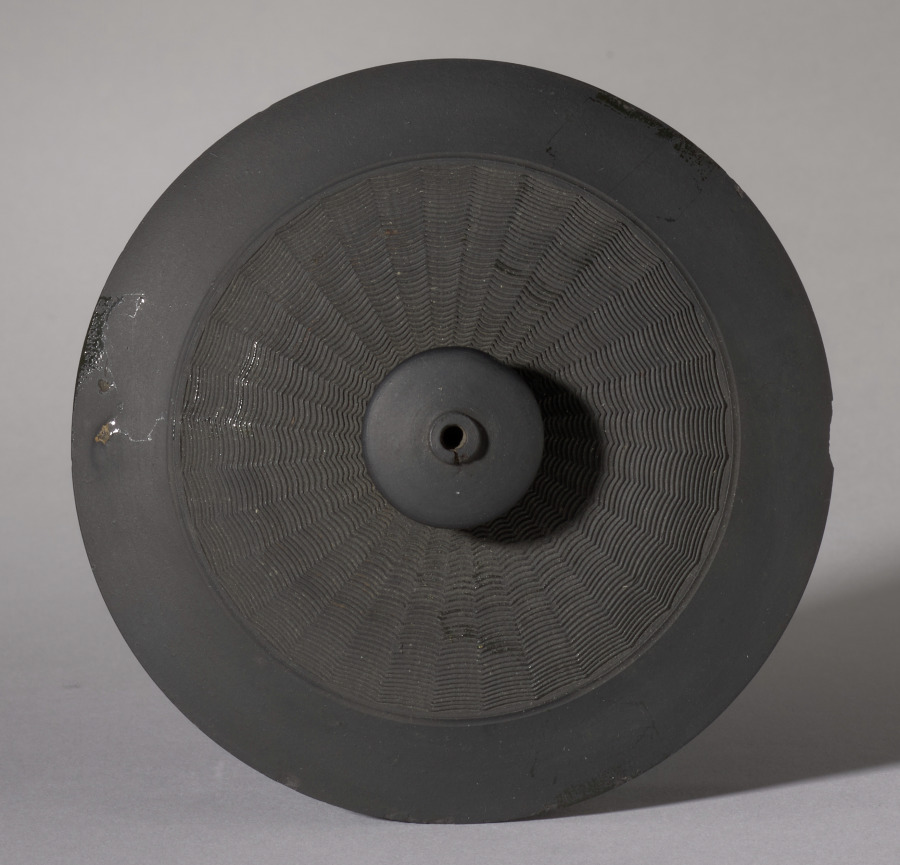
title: Teapot (lid)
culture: England, Staffordshire, 19th century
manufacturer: Davenport Pottery and Porcelain Factory (British)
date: 1800s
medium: black basalt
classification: Ceramic